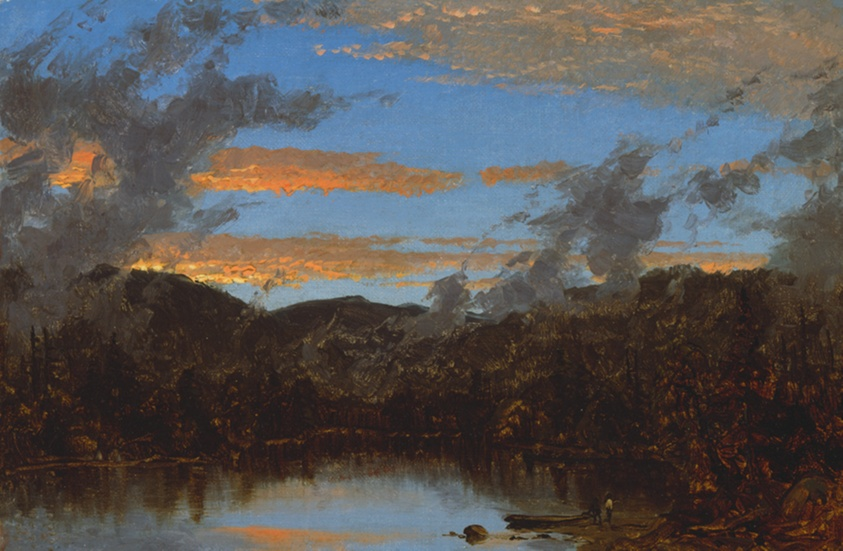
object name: Painting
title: Mist Rising at Sunset in the Catskills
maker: Sanford Robinson Gifford (American, 1823–1880)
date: c. 1861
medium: Oil on canvas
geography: United States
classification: painting; american arts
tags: landscapes